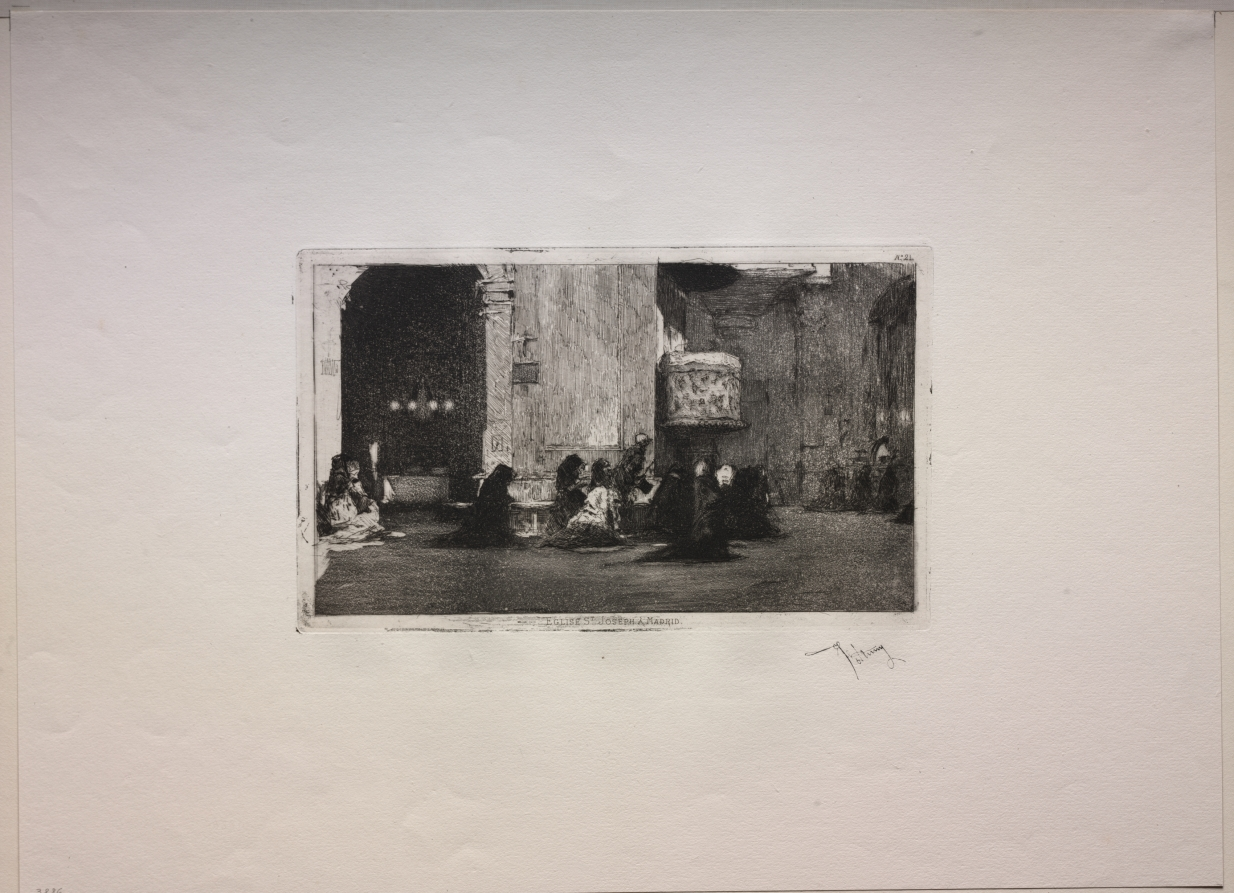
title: Saint Joseph Church, Madrid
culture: Spain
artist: Mariano Fortuny (Spanish, 1838–1874)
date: c. 1860–70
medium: etching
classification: Print